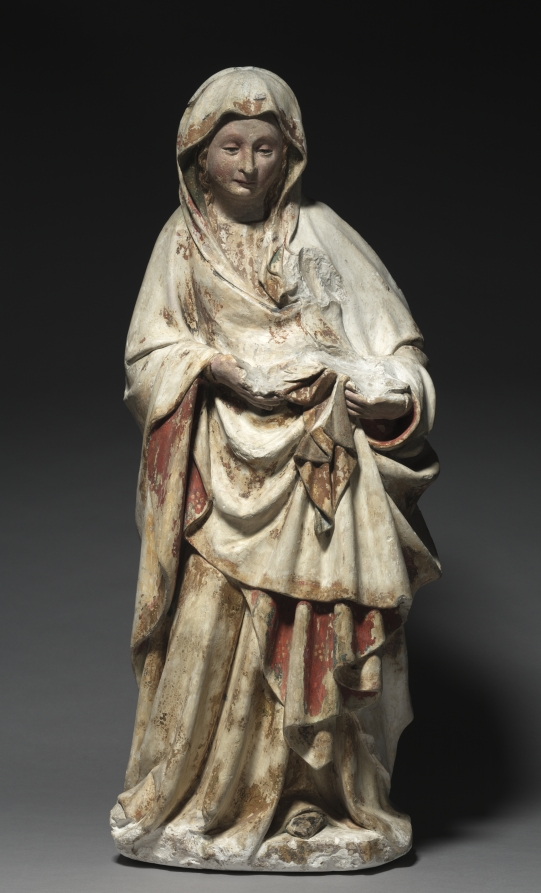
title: Standing Virgin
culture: Netherlands, active Dijon, 15th century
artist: follower of Claus de Werve (Netherlandish, 1380–1439)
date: c. 1440–1450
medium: painted and gilded limestone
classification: Sculpture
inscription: inscriptions on reverse.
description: This standing Virgin now lacks the child she once cradled in her left arm. The sculpture may have been damaged in the French Revolution by falling onto its face. It was carved from soft white limestone of a type known to be quarried at Asnières-lès-Dijon, near Champmol. The figure recalls many of the hallmarks of the style of Claus de Werve, a Netherlandish artist active at the court of Burgundy. The Virgin has a sweet, round face that is also smooth and fleshy, her eyelids droop pensively and she is engulfed in rich voluminous draperies that cascade in deep folds. This sculpture should be seen as a charming reflection of de Werve’s many Virgin and Child groups. It was probably carved by a follower closely acquainted with his style.